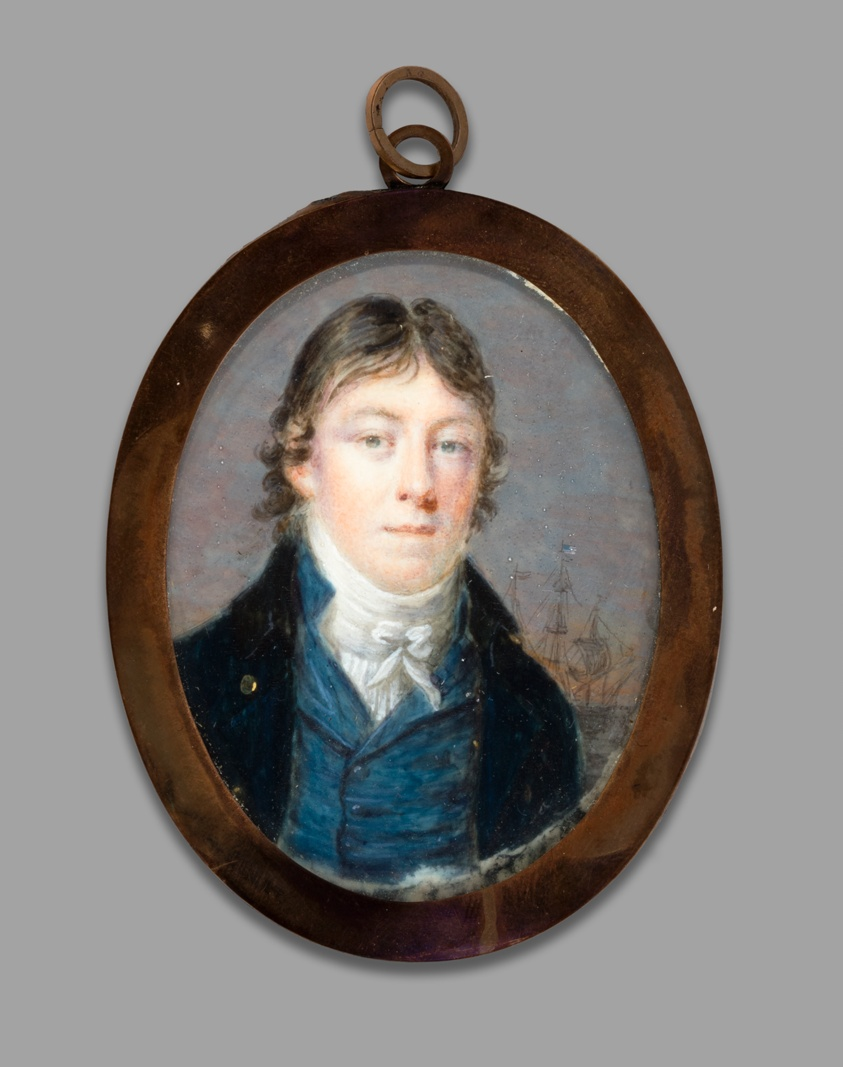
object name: Miniature Painting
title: Portrait of Samuel Armitage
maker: Thomas Birch (American, 1779–1851)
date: c. 1840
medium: Oil on ivory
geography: United States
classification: miniature painting; european decorative arts; miniature; decorative arts